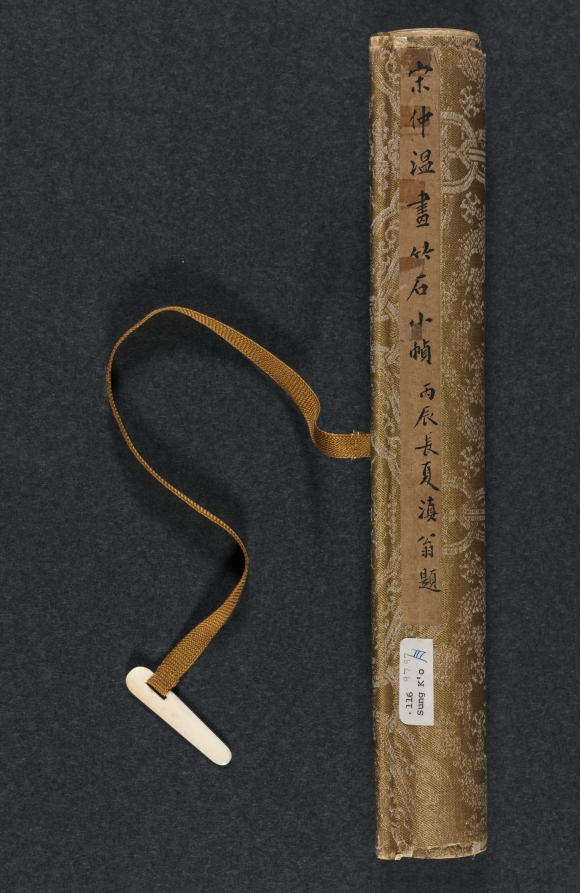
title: Landscape with Bamboo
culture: China, Yuan dynasty (1271-1368)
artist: Song Ke (Chinese, 1327–1387)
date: 1300s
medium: Handscroll; ink on paper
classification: Painting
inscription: 東吳宋克戲為仲幾畏友圖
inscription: 2 colophons and 14 additional seals: 1 seal of Yü Chung-chi (14th c.); 1 seal of Wu Ch'eng (1469 jinshi); 1 colophon and 2 seals of Wu K'uan (1435–1504); 1 colophon and 9 seals of Cheng Qi (1911–1988); 1 seal unidentified.